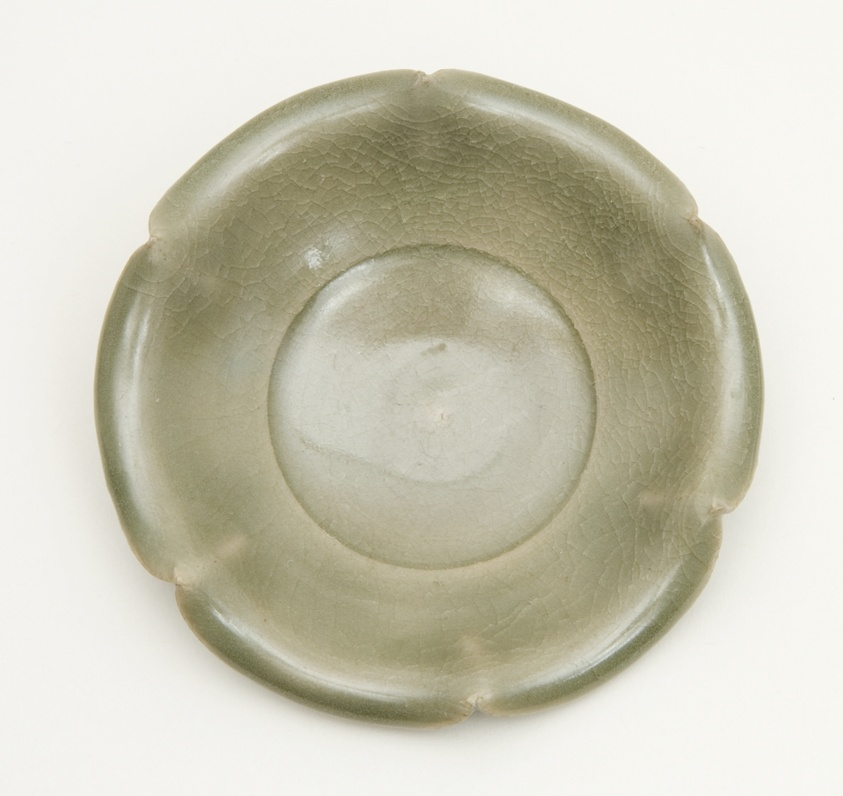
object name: Vessel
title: Dish with Inverted Petal-Lobed Rim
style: Chinese (culture or style)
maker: China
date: Northern Song dynasty (960–1127)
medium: Yaozhou ware; glazed stoneware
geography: China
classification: dish (vessel); vessel